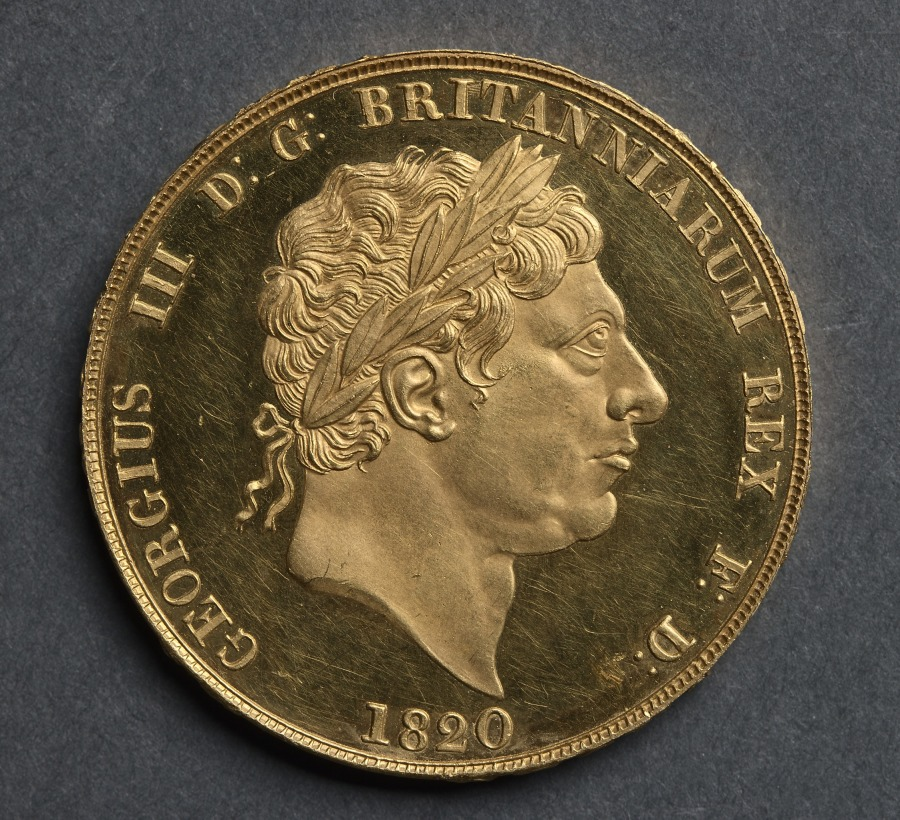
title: Two Pound Piece: George III (obverse); St. George and the Dragon (reverse)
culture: England, George III, 1760-1820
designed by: after Benedetto Pistrucci (Italian, 1784–1855)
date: 1820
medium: gold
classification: Coins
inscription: GEORGIUS III . D: G: BRITANNIARUM REX F: D: 1820.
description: The five- and two-pound pieces struck for George III were only struck as patterns in this, the last year of the his reign. No pieces of either denomination were put into circulation. This very rare piece shows Pistrucci's Saint George as modified by Wyon. In the original the lance is broken; here the lance a been converted by Wyon into a sword, and it has appeared thus in future coinage. Later, in currency issues, the streamer disappears for a time for the helmet.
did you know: Benedetto Pistrucci was an Italian gem and coin engraver, medallist, and carver of cameos.